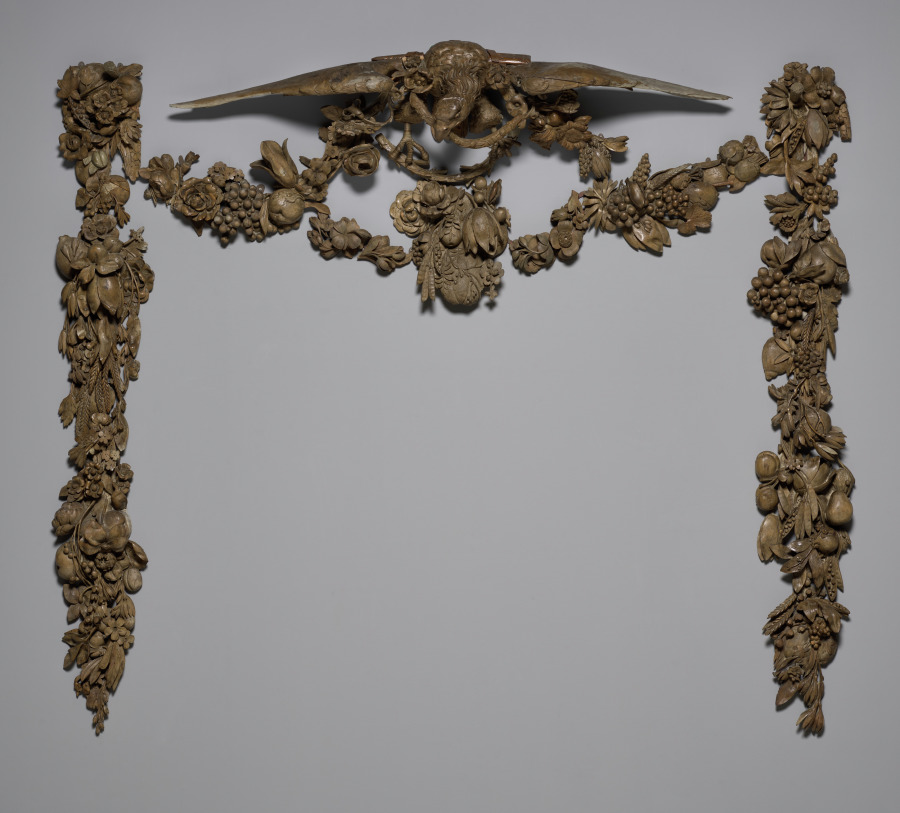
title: Overmantel Decoration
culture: England, 17th century (Charles II)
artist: Grinling Gibbons (British, 1648–1721)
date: c. 1675–77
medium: lindenwood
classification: Sculpture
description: The arrangement of architectural elements within grand interior spaces in the late 1600s and early 1700s emphasized symmetry and height. Decorative elements such as elaborately carved mantels, mirrors, paintings, and applied wall decorations were often stacked to achieve a visual focal point at one or both ends of the room. This particular overmantel decoration once hung above the fireplace in the Green Drawing Room of the Earl of Essex at Cassiobury in Watford, near London. In 1823, the British painter William Henry Hunt (1790–1864) produced a watercolor of the drawing room which featured this overmantel decoration. Grinling Gibbons was born in Rotterdam, the Netherlands, of English parents. After training there as an artist, he came to England in the 1660s and soon began to work as a sculptor of interior ornament, particularly in wood. One of his first large-scale decorative projects was the series of interiors at Cassiobury House.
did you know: The swags of fruit and foliage featured in this wooden overmantel decoration evoke the bounty of the English countryside.